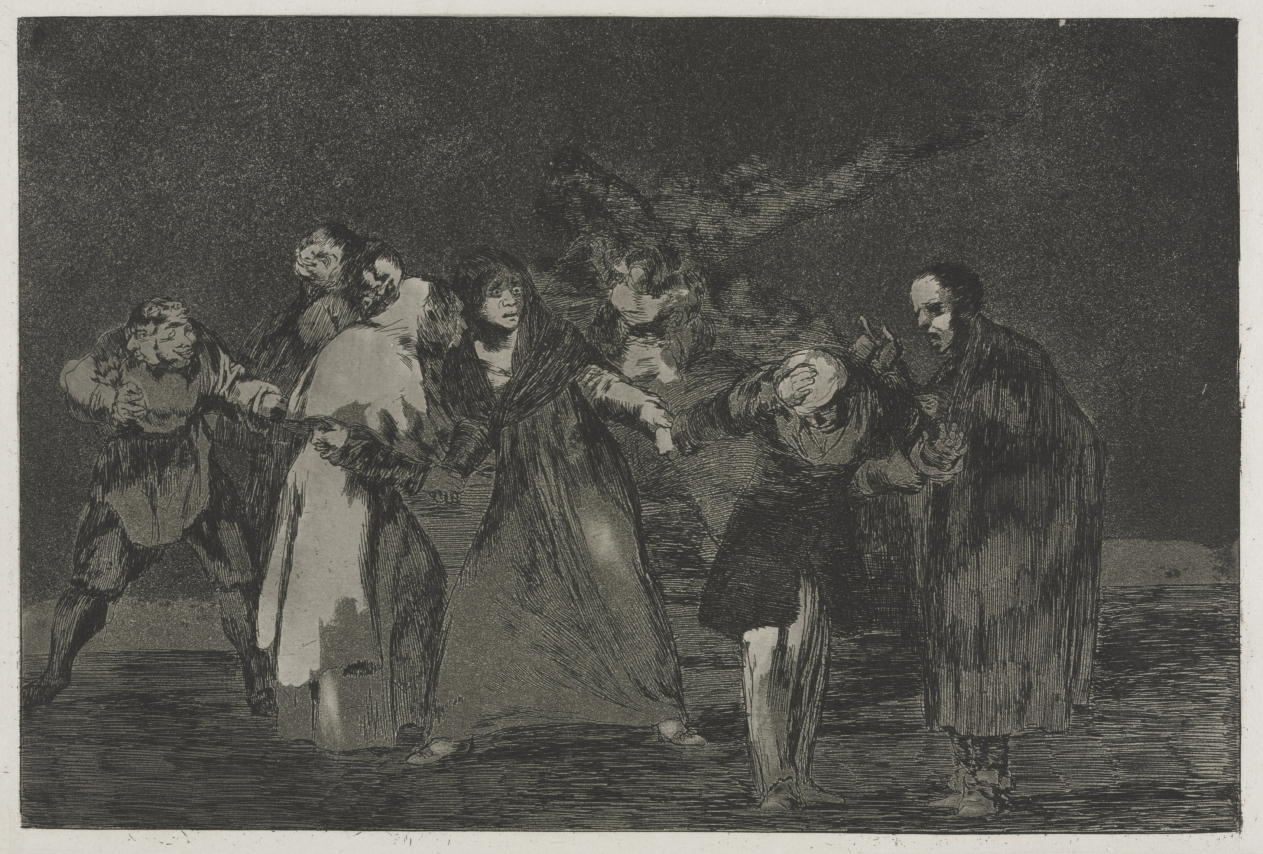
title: The Proverbs: Wounds Heal Quicker Than Hasty Words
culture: Spain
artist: Francisco de Goya (Spanish, 1746–1828)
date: 1864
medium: etching and aquatint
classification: Print